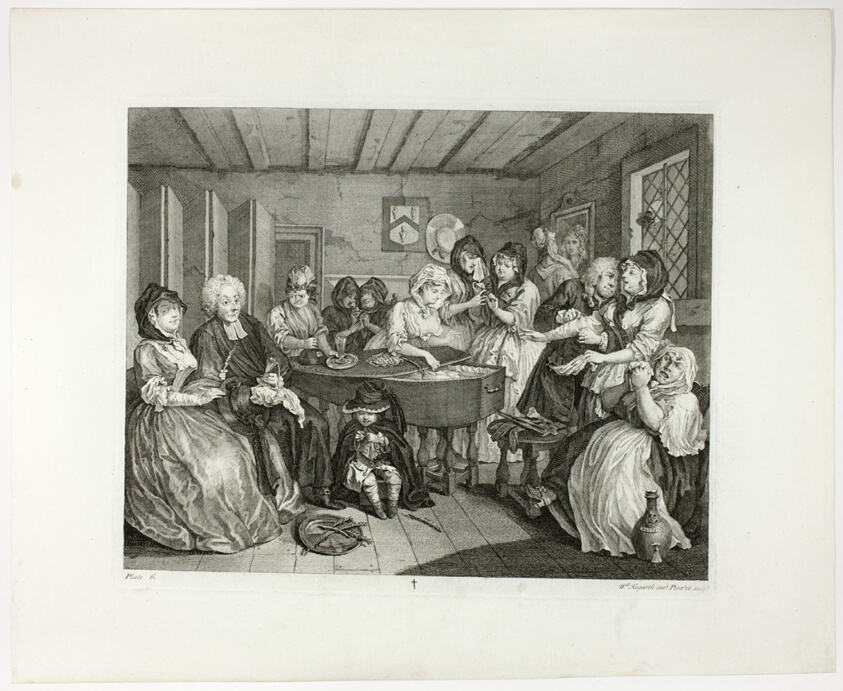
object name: Print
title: Plate six, from A Harlot's Progress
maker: William Hogarth (English, 1697-1764)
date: 1732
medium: Engraving in black on ivory laid paper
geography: England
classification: engraving; paper; print; prints and drawing